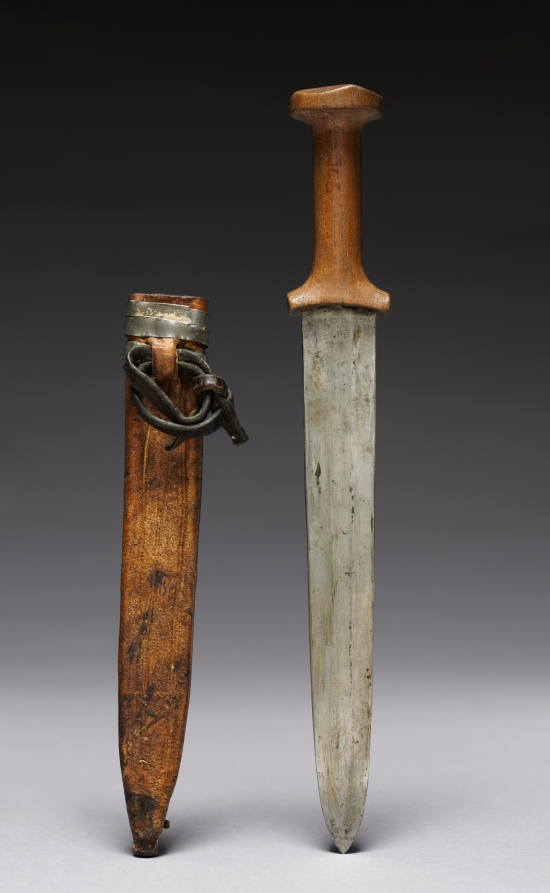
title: Knife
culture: Africa, Central Africa, Democratic Republic of the Congo, Mangbetu-style maker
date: 1900s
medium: Iron, leather, and wood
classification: Arms and Armor